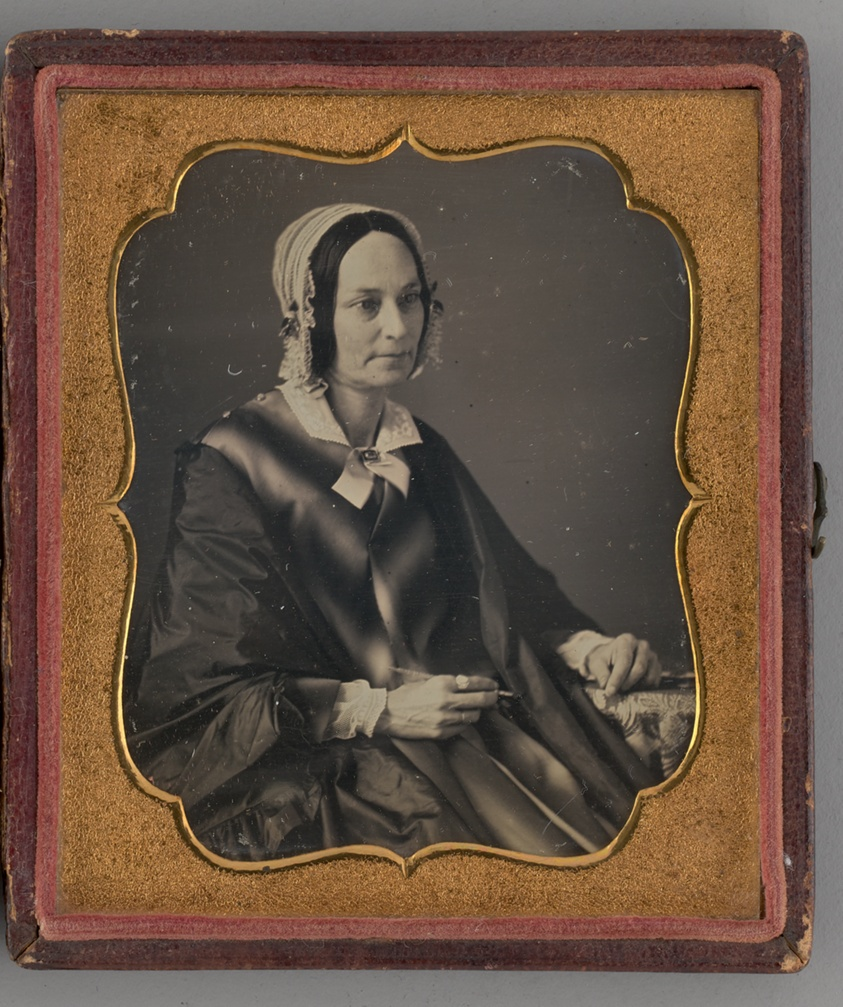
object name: Photograph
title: Untitled (Portrait of a Seated Woman)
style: 19th century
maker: Unknown maker; American, 19th century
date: 1848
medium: Daguerreotype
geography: United States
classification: portrait; photograph; photographic process; photography; portrait; daguerreotype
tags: lundberg collection, portraits, portraits: female subject, female, photography, portrait